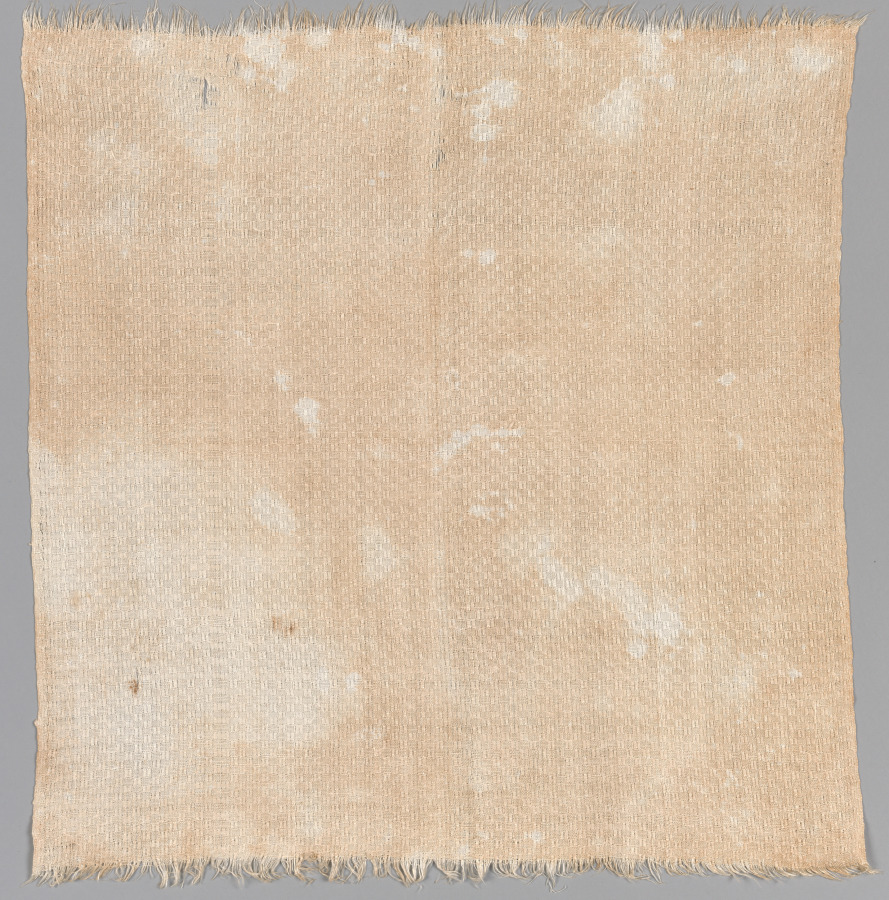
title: White Linen Piece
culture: America, Connecticut, early 19th Century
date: c. 1800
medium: linen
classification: Textile